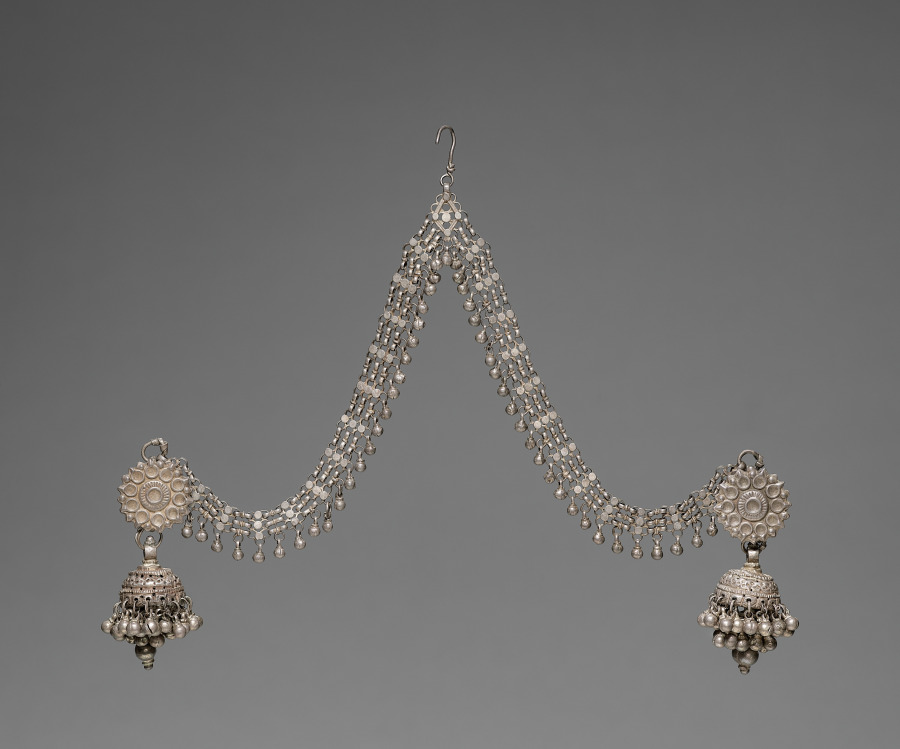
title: Ear Studs and Chains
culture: India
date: 1800s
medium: silver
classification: Jewelry